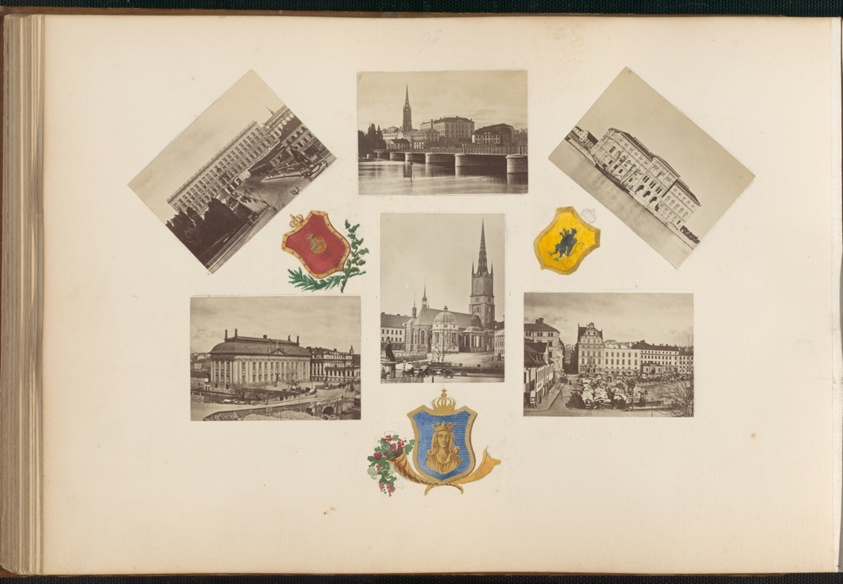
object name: Photograph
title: The Madame B Album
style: 19th century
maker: Marie-Blanche Hennelle Fournier (French, 1831–1906)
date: 1870s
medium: Albumen prints with watercolor (in album)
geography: France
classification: photograph; albumen silver print; photography